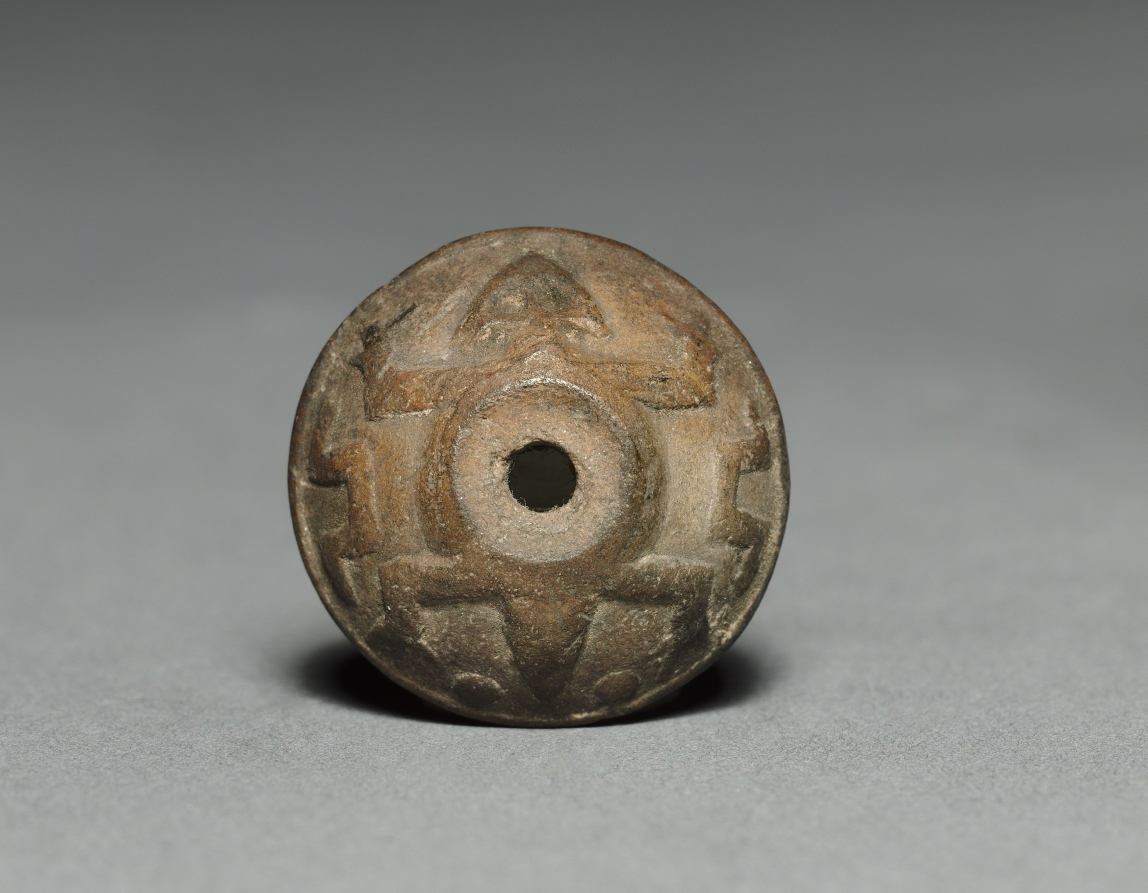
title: Spindle Whorl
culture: Mexico, 16th century or earlier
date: before 1521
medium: terracotta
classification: Ceramic